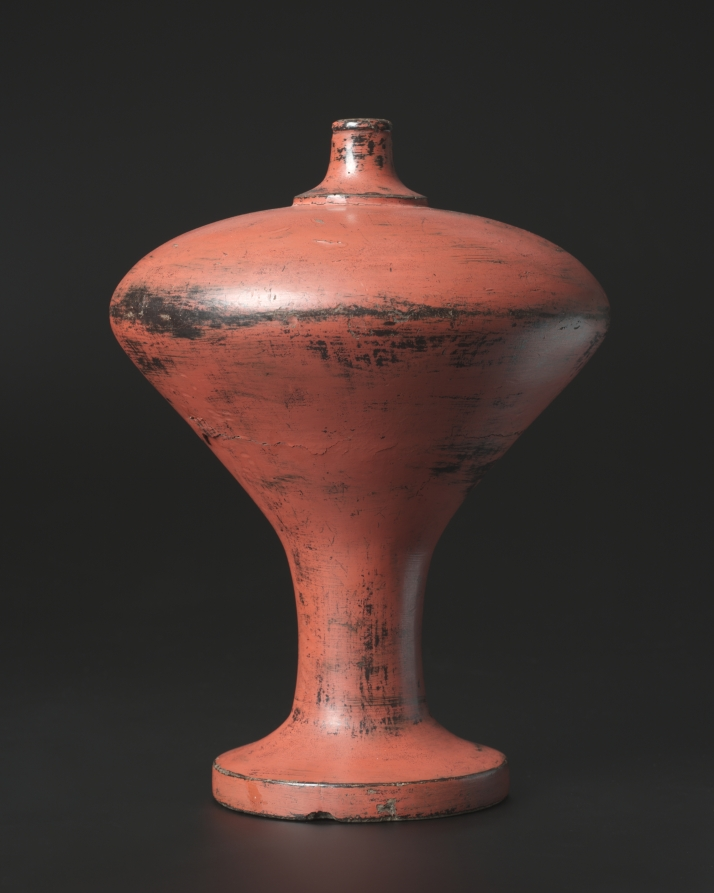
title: Sake Bottle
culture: Japan, Muromachi period (1392–1573)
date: late 1300s–late 1500s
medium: Negoro lacquer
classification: Lacquer